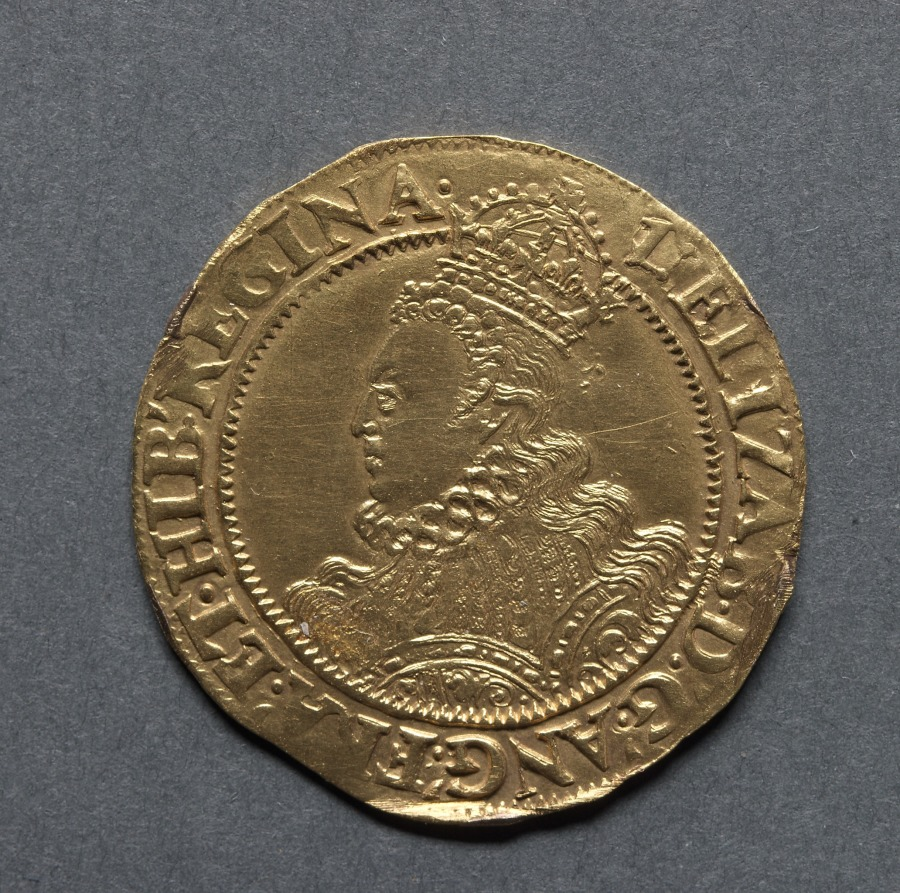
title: Half Pound: Elizabeth I (obverse); Crowned Shield of Arms (reverse)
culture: England, Elizabeth I, 1558-1603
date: 1601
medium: gold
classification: Coins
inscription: ELIZAB' D'.G'. ANG'. FRA'. ET: HIB. REGINA.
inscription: SCVTVM: FIDEI: PROTEGET: EAM.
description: The design of this rare piece is similar to another in the collection of Elizabeth I, 1969.184. However, the initial marks denote it was struck in 1601. Elizabeth I is shown finely dressed and around her is her abbreviated title, Elizabeth by the Grace of God, Queen of England, France and Ireland. On the reverse is the shield of arms of England showing lions and the fleur-de-lis. Although Elizabeth was officially titled Queen of France, the title was a hollow one. Calais, England's last French territory, was lost in the reign of Mary I. This version of the coat of arms lasted until James I who added the arms of Scotland and Ireland.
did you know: Elizabeth I was the last of the five monarchs from the House of Tudor.